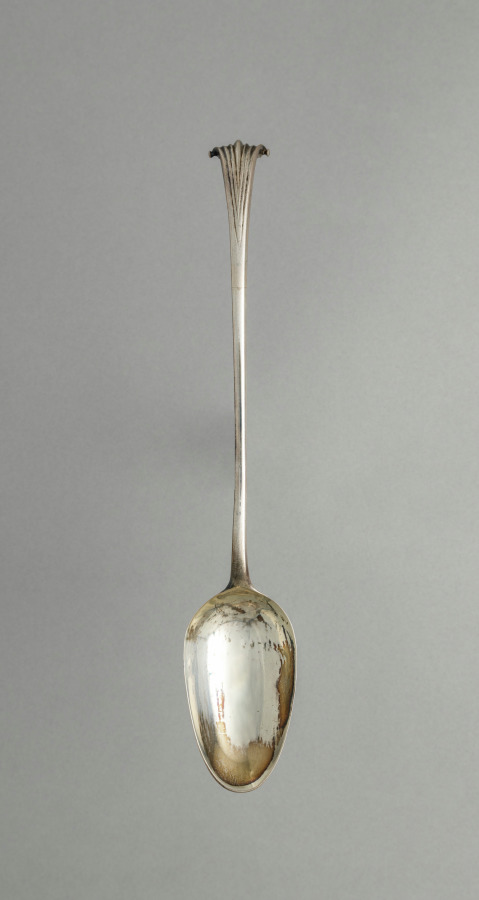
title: Serving Spoon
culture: England, London, 19th century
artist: assisted by William Wooler (British)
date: 1763–1764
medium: silver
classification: Silver